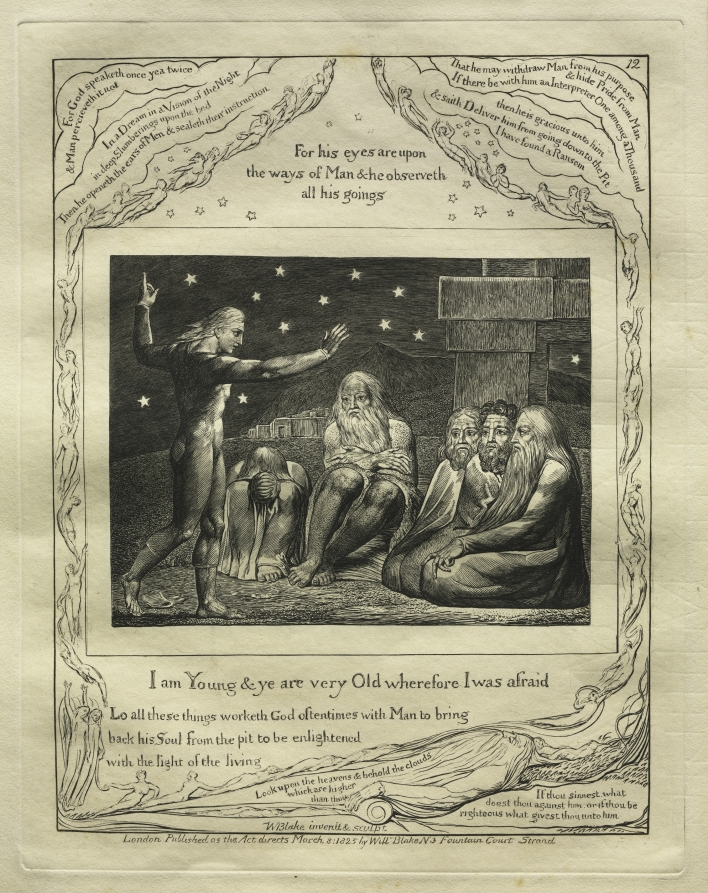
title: The Book of Job: Pl. 12, I am Young and ye are very Old wherefore I was afraid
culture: England, 19th century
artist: William Blake (British, 1757–1827)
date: 1825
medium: engraving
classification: Print